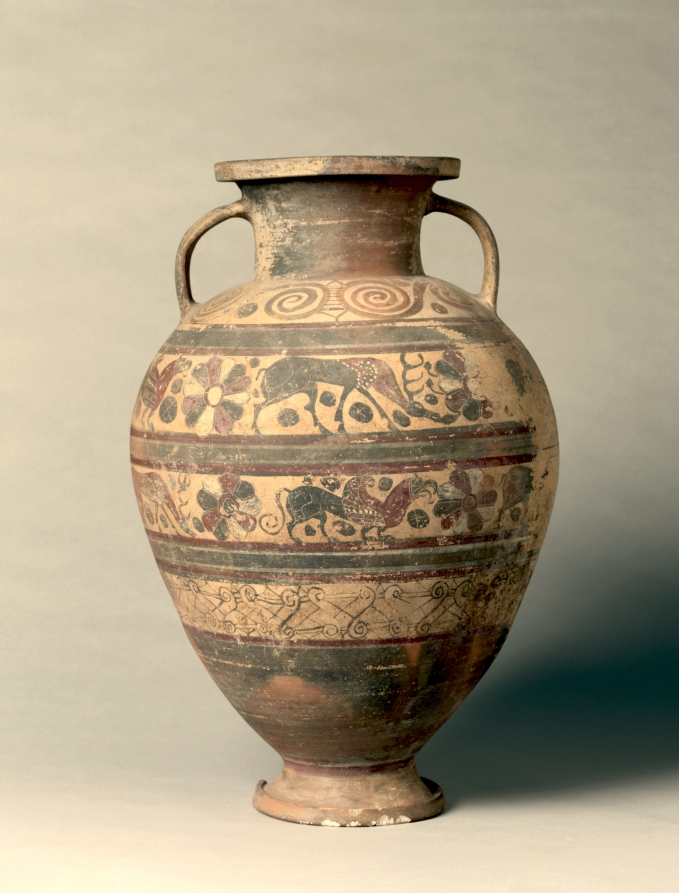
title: Black-Figure Neck-Amphora (Storage Vessel): Animal Friezes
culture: Etruscan (Etrusco-Corinthian)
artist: attributed to St. Louis Painter (Etruscan, active at Vulci, c. 600–580 BCE)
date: c. 600–580 BCE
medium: ceramic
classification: Ceramic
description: Although seemingly simple in design, this amphora populated with animals (some mythological) and vegetal ornaments speaks to complex cultural intermingling in the ancient world. Known as “Etrusco-Corinthian,” the vase was made in Vulci, an Etruscan site with local workshops influenced by the Greek pottery imported there. These imports, especially from the ancient city of Corinth, helped to bring certain motifs and creatures borrowed from the Near East—such as the griffins here—to the Italian peninsula. Among several lively Etruscan elements on this vase are flowering rosettes, including one about to be eaten by a stag foraging in the upper band.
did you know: The same potter and painter (whether one person or two) also made vases now in Saint Louis and Paris.